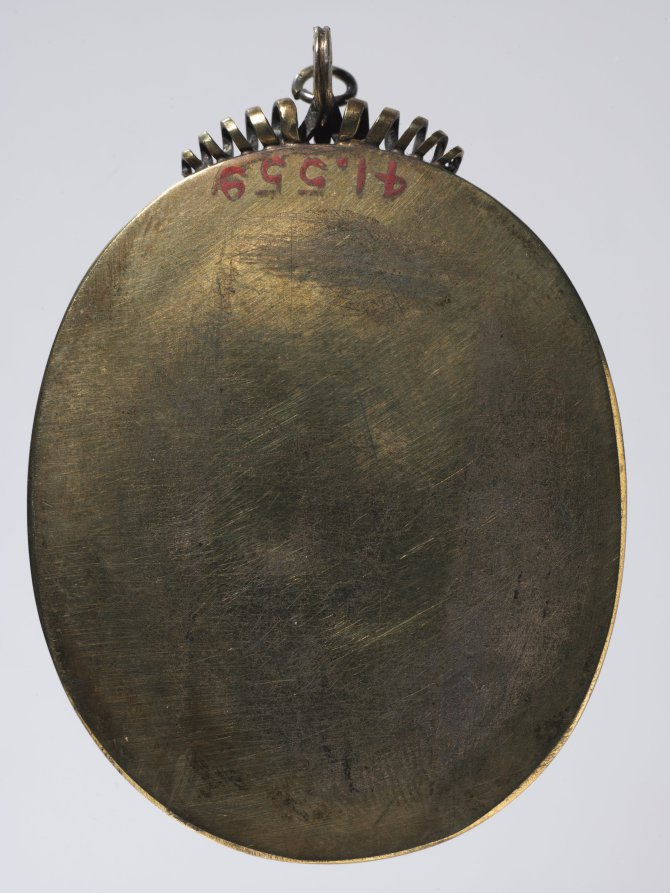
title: Portrait of Lucy Russell, Countess of Bedford, née Harrington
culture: England, early 17th century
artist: Isaac Oliver (French, c. 1565–1617)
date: c. 1608–1616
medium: watercolor on vellum with gold and silver in a 17th-century silver gilt frame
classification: Portrait Miniature